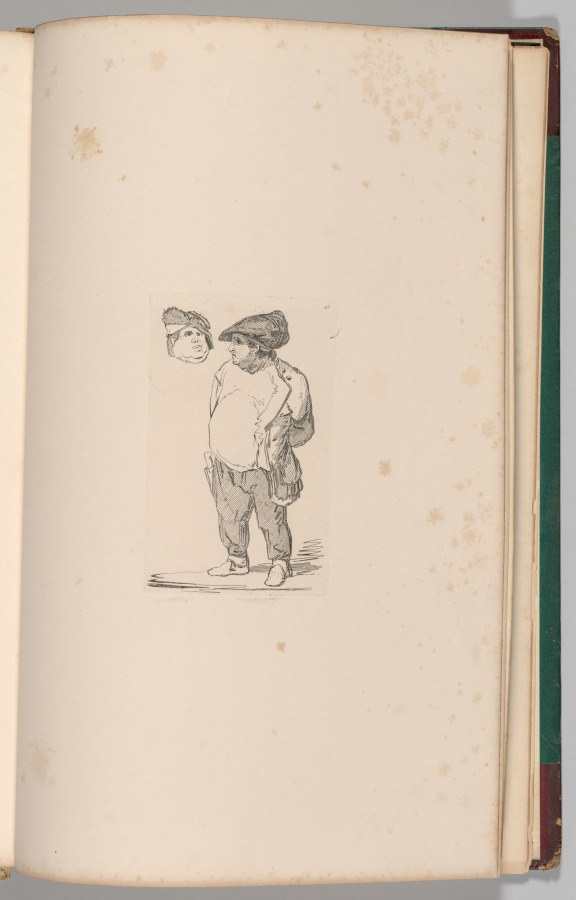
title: Liber Studiorum: Plate 47, A Study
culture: England, 19th century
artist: John Sell Cotman (British, 1782–1842)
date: 1838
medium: softground etching, from a bound volume containing 48 plates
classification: Bound Volume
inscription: In plate, within image, upper right: 47